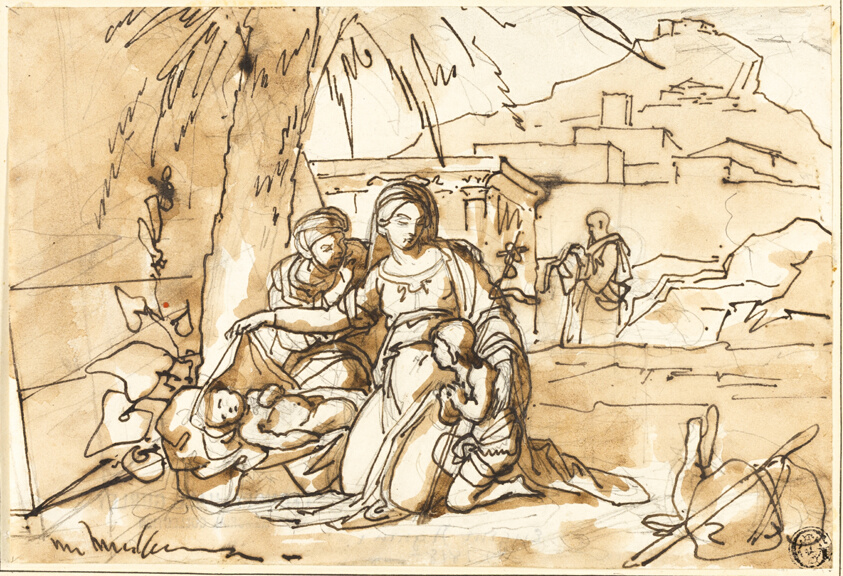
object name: Drawing and Watercolor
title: Madonna and Child, Saint Anne and Infant Saint John, with Saint Joseph in Background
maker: Eurenio Agneni; Italian, 1819-1888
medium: Pen and brown ink, with brush and brown wash and with graphite, on ivory wove paper, tipped onto cream wove paper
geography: France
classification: pen and ink drawings; drawings (visual works); prints and drawing